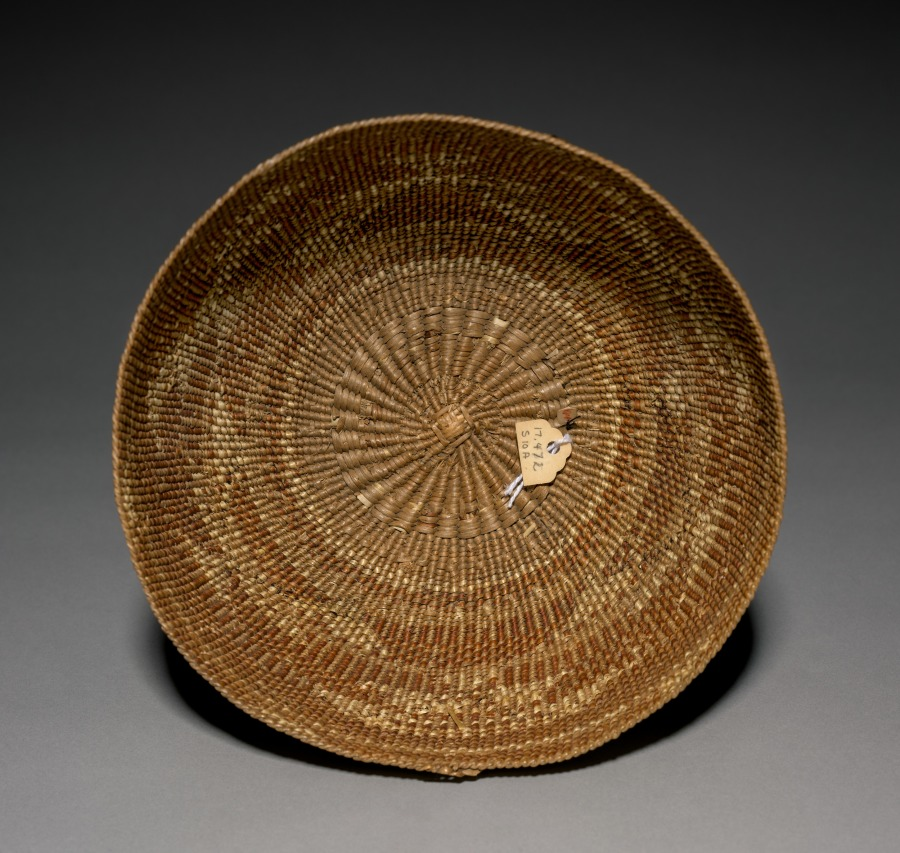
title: Hat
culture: California, late 19th- early 20th century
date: c 1875–1917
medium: plain-twined hazel with decoration in beargrass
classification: Basketry